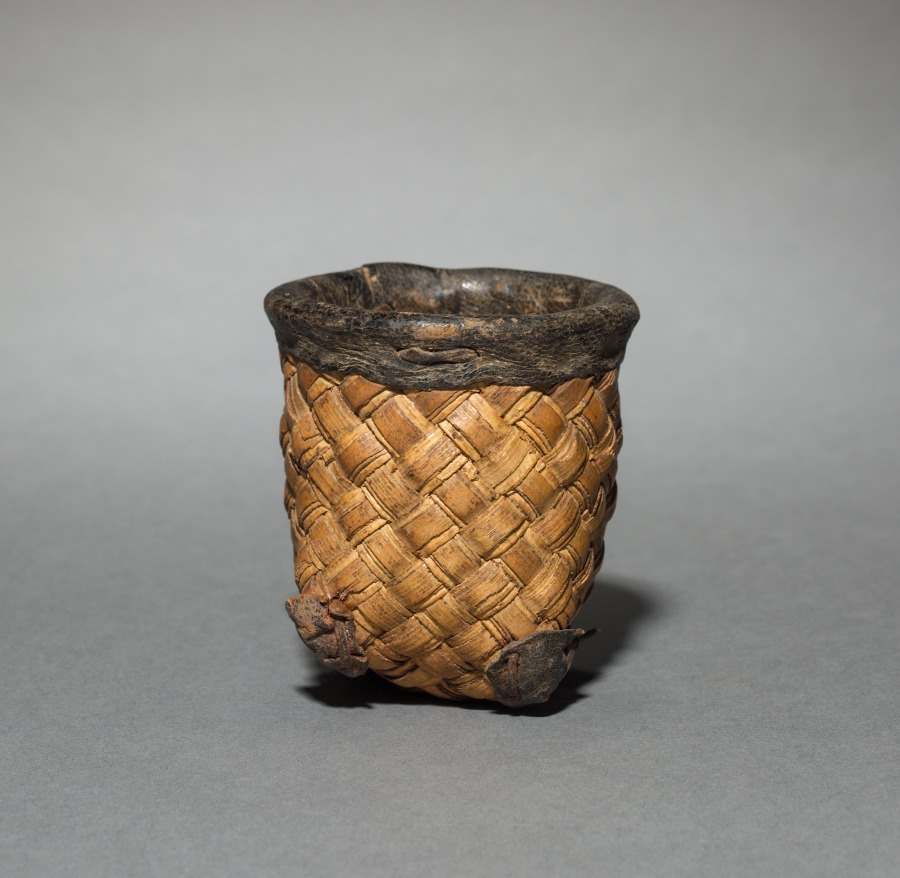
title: One of Ten Nesting Wedding Baskets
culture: Africa, Western Africa, Burkina Faso, Lobi–style maker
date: c. 1900s?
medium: Plant fiber and leather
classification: Vessels